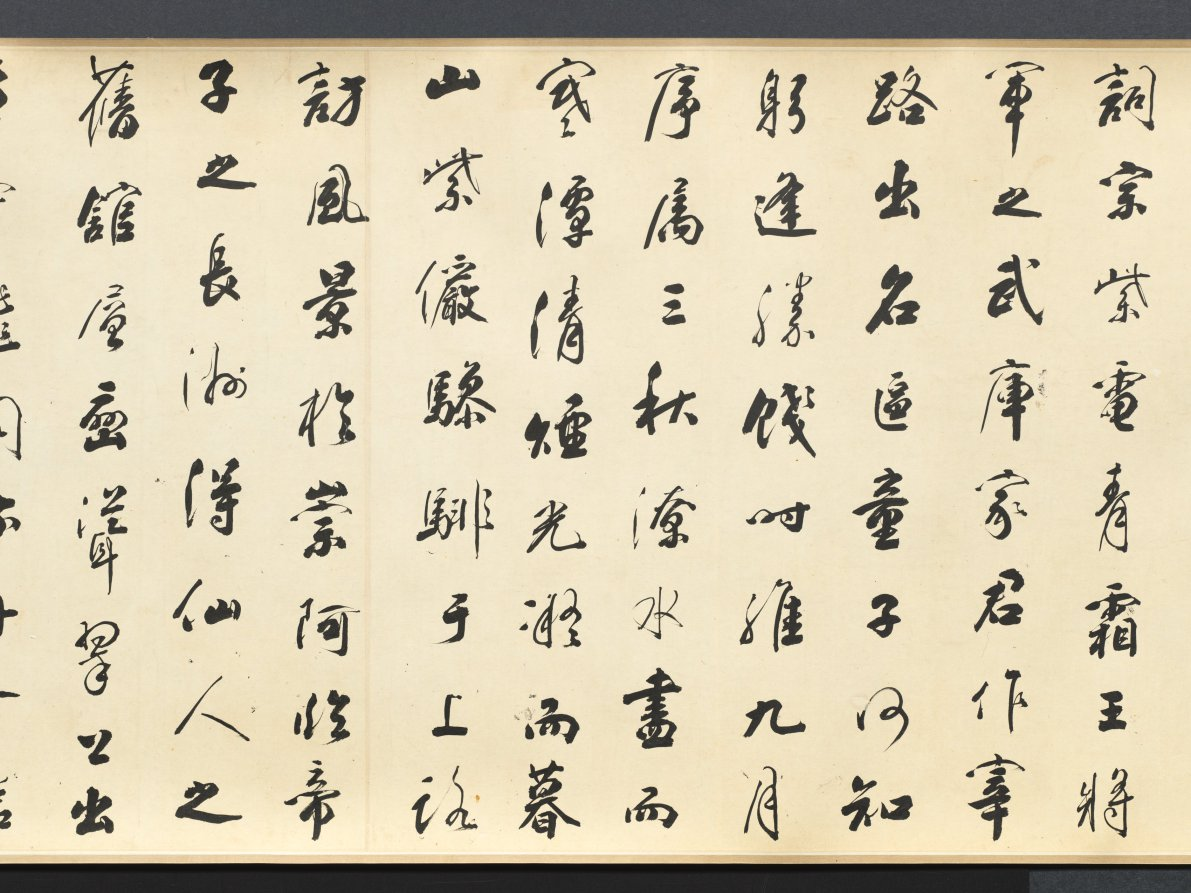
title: Calligraphy in Running Style based on Wang Bo's Essay on Tengwang Pavilion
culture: China, Changbai, Qing dynasty (1644-1911)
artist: Tiebao (Chinese, 1752–1824)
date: 1811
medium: handscroll, ink on paper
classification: Calligraphy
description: A member of the Donggo clan, Tiebao belonged to the Manchu Plain Yellow Banner army. As an official in the Qing court, he endured considerable vicissitude and his career was never smooth. Celebrated as a man of letters, he oversaw the publications of the Manchu military system as well as an anthology of poems by members of the imperial family and other Manchu dignitaries. In calligraphy, he was regarded as the equal of such eighteenth-century luminaries as Liu Yong (1720-1805) and Weng Fanggang (1733-1818). This handscroll is a work of his mature years and is exemplary of his disciplined and highly subtle approach to the art of calligraphy.